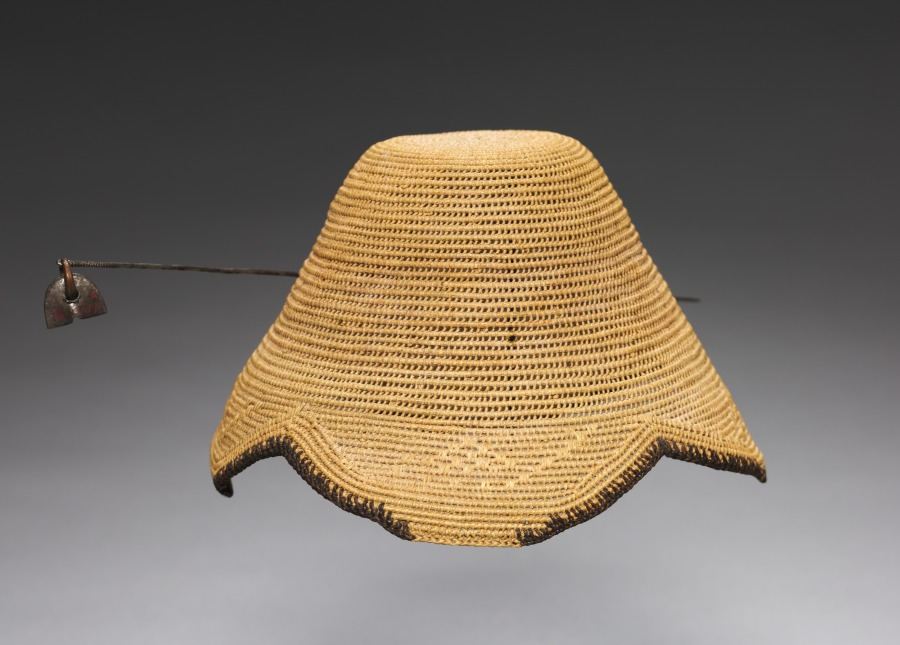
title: Hat (laket)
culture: Africa, Central Africa, Democratic Republic of the Congo, Kuba-style maker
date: early 1900s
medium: Raffia and dye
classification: Garment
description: Titled Kuba men and prominent women wear the laket, a small ornate dome-shaped hat. An essential fashion item of adult men in good social standing, it focuses special attention on the head as a significant marker of individual identity, ethnic affiliation, status, and role in society. This prestige object is secured on the crown of the head with a nine-and-a-half-inch metal pin that pierces through the hat onto a clump of hair. This laket is made from raffia palm fiber coiled into threads and woven in different patterns. There are two examples of the laket: the plain type with the flat top, and the more elaborate type called the laket mishiing.